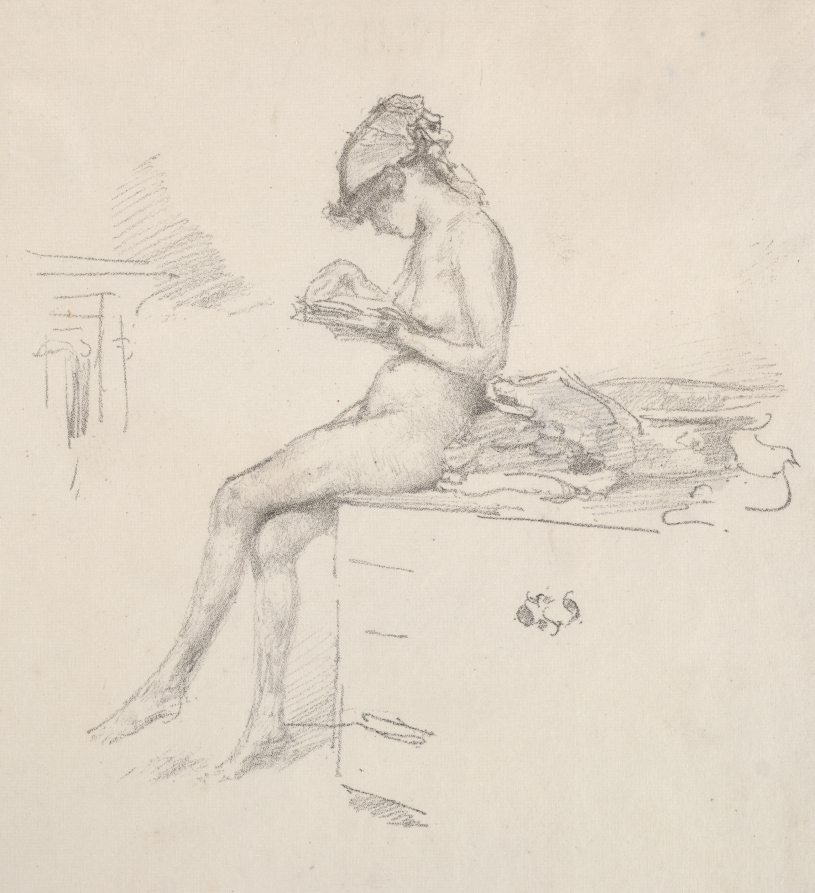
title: The Little Nude Model Reading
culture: America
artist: James McNeill Whistler (American, 1834–1903)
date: 1890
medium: lithograph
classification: Print